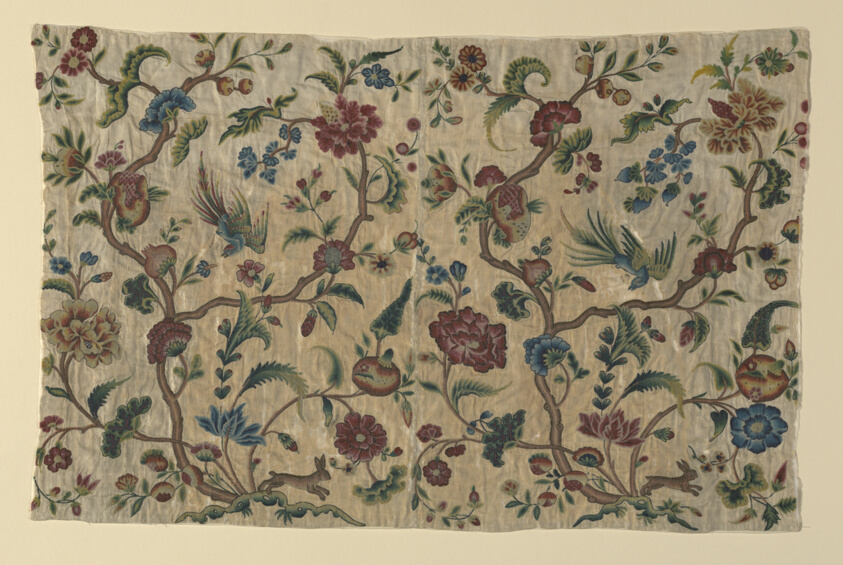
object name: Textile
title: Portion from a Valance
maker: England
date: 1701/25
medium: Linen, plain weave over coarser and heavy plain weave linen, embroidered through both layers in wool yarns; in chain, long, short and feather stitches; French knots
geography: England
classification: textile; needlework (visual works)